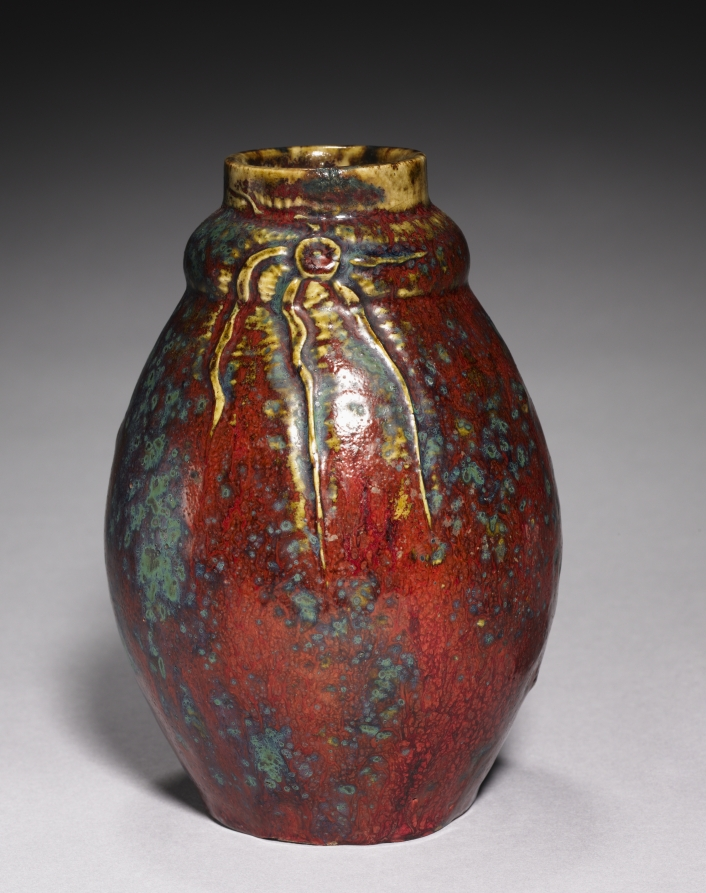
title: Vase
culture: America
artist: Pierre Adrien Dalpayrat (French, 1844–1910)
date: c.1900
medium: stoneware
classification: Ceramic